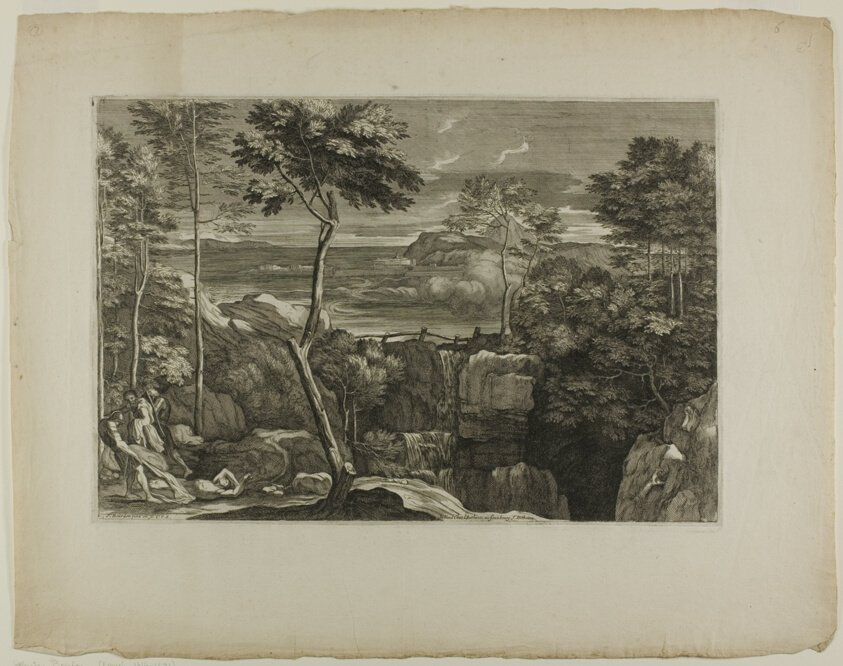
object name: Print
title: Landscape with Three Brigands and Their Victim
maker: Sébastien Bourdon (French, 1616-1671)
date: 1668–71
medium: Etching on ivory laid paper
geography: France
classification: etching; print; prints and drawing